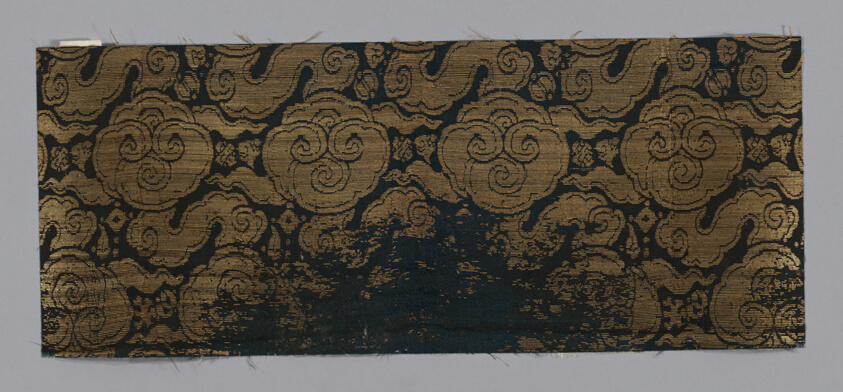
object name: Textile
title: Fragment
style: edo (japanese period)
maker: Japan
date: 18th century, Edo period (1615–1868)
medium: Satin, silk and gilt paper; 1-2 strips to m.m.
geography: Japan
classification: textile; weaving